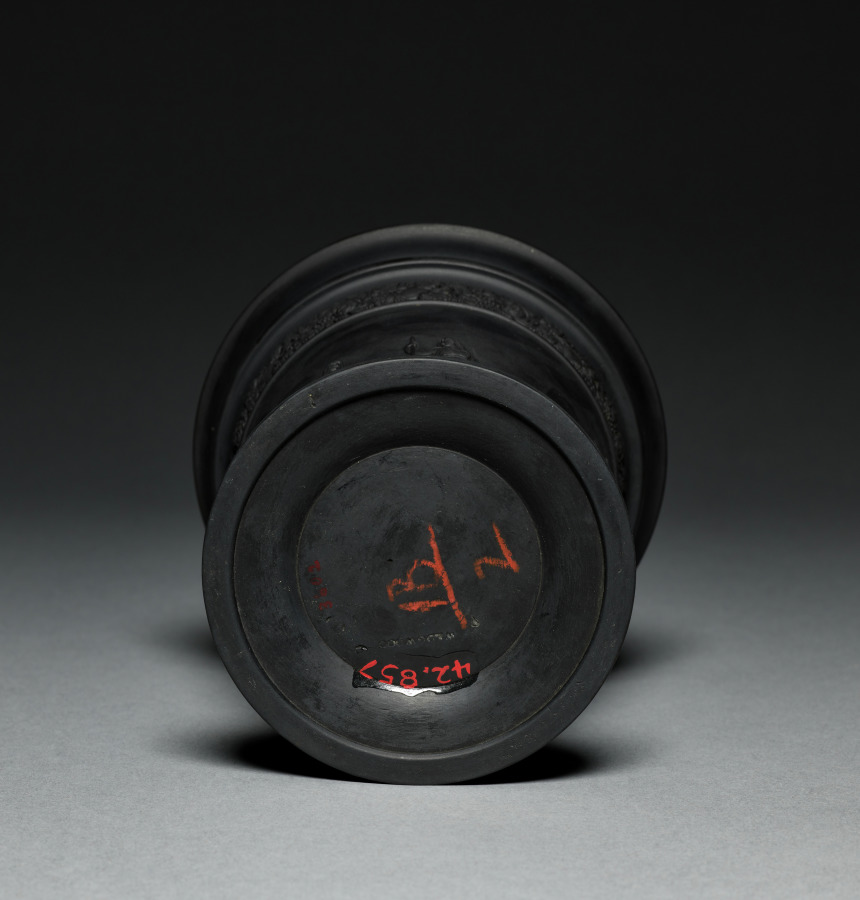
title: Jardiniere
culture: England, Staffordshire, 18th century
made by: Wedgwood Factory (British)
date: late 1700s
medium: black basalt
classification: Ceramic